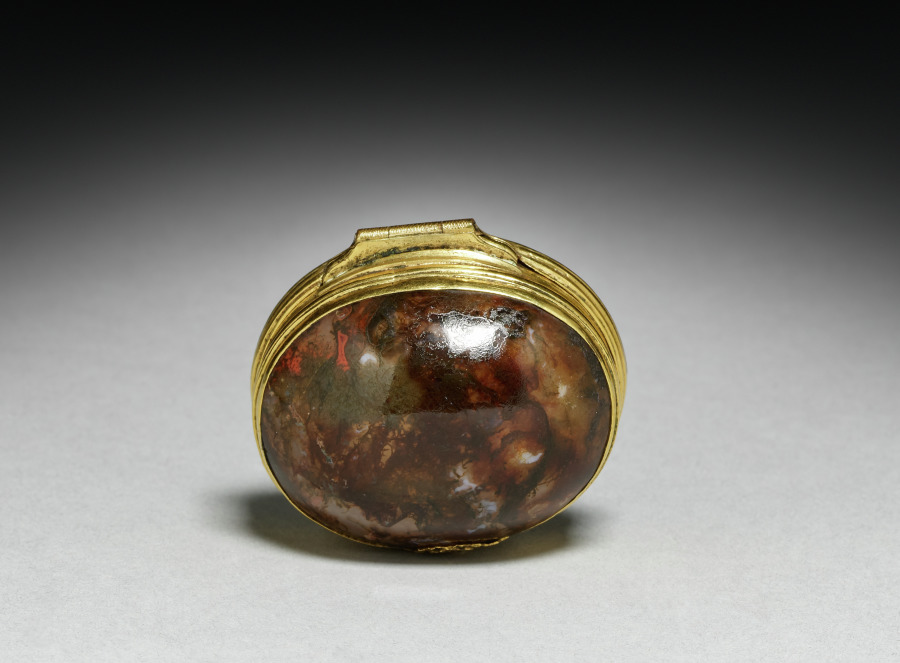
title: Box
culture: Germany, 18th century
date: 1730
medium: agate and gold or gilt metal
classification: Miscellaneous